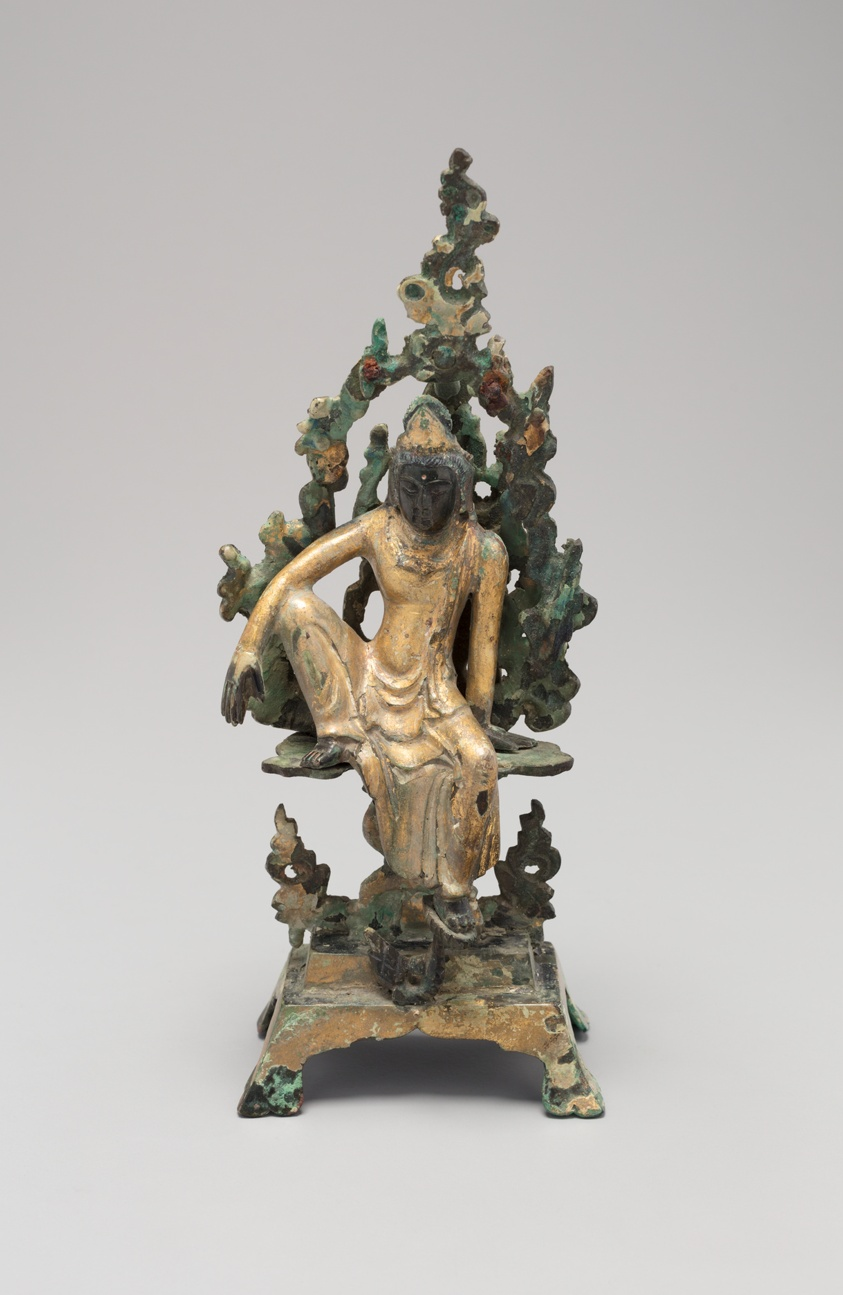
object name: Sculpture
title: South Sea Guanyin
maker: China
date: Song dynasty (960–1279)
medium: Gilt bronze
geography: China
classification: sculpture